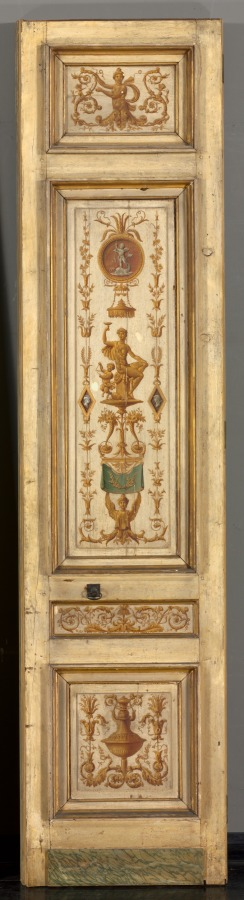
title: Double-leaf Doors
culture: France, 18th century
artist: Pierre Rousseau (French, 1751–1829)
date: 1790s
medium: oil on wood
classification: Painting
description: Shifts in style and taste often result in changes to original architectural details. Rousseau painted these doors with imitation dark wood grain. Another craftsman later scraped off the dark color surrounding the classical designs. This set was conserved in 1979 and retains more traces of the original graining than the other doors by this artist in the museum's collection.